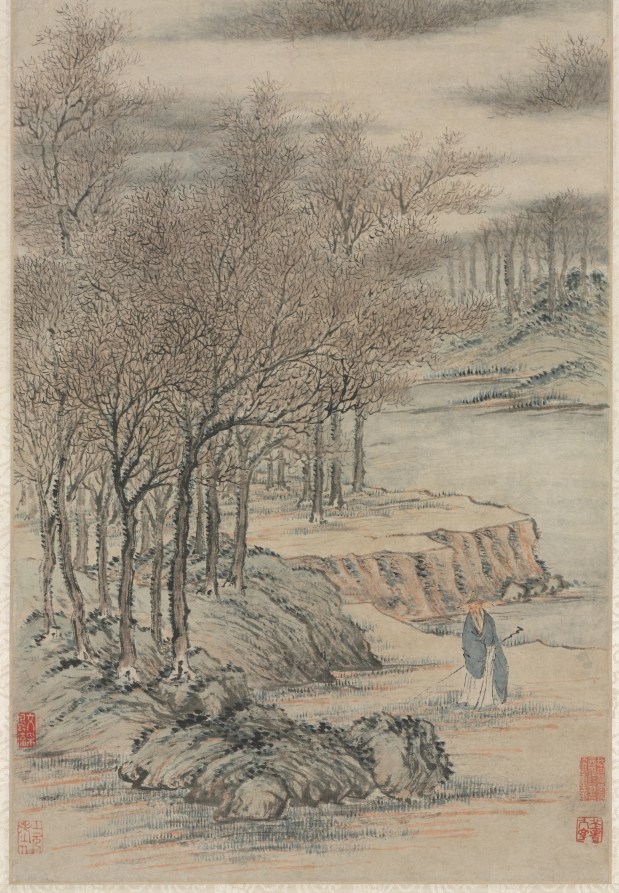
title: Listening to the Sound of Autumn in a Misty Grove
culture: China, Qing dynasty (1644-1911)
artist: Zhang Feng (Chinese, active c. 1632–1662)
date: 1657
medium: Hanging scroll; ink and color on paper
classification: Painting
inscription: Artist's inscription, signature, and 2 seals: Frosty colors have just appeared throughout the countryside,/ Autumn sounds echo unexpectedly through the trees./ The distant mountains cannot be seen,/ As the evening mist spreads, thicker and deeper./ Casually painted at the bamboo window on the solstice day of the dingyou year [1657]. Zhang Feng. [seal] Feng. [seal, lower left corner] Shangyuan Laoren. (Translation by LYSL/HK/WKH)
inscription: 3 additional seals: 1 of Fa Liang (Qing Dynasty); 2 unidentified.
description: Zhang Feng from Nanjing passed the local government examinations shortly before the fall of the Ming dynasty. With the Manchu conquest, he joined the ranks of loyalists who refused to serve the new regime. He chose the intermittently frugal life of a Buddhist adept. Many of his paintings lament the loss of the empire. In this scroll, he depicts a lone figure in a stark landscape of frosty atmosphere enshrouded in mists. Close looking reveals red strokes that color the grounds, a way of expressing his loyalty to the Ming whose family name Zhu means red.